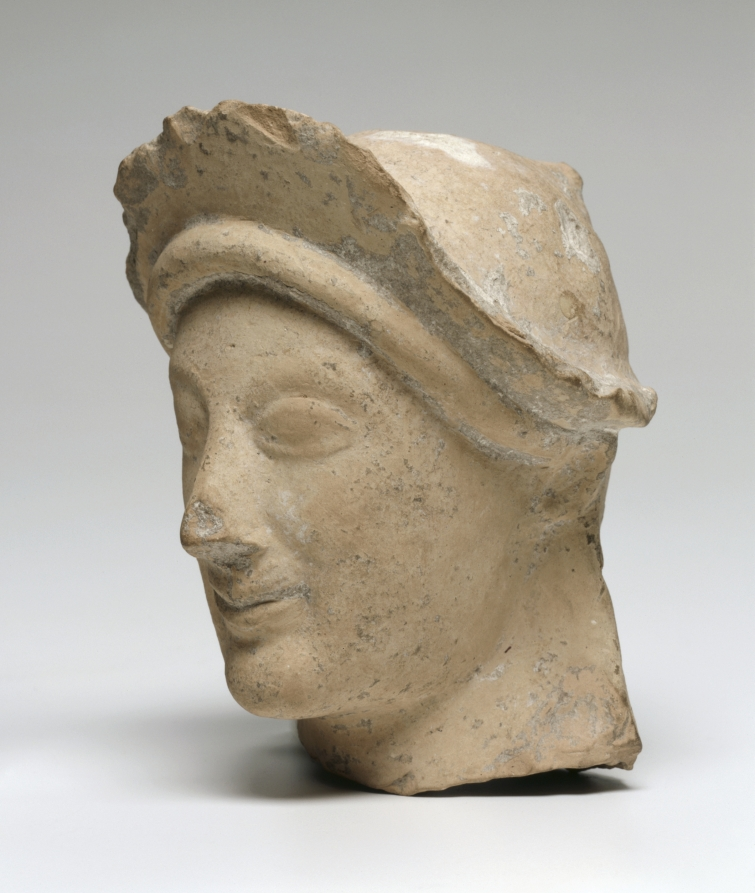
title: Woman's Head with Crown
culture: Greece, Sicily(?)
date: 500s BCE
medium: terracotta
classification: Sculpture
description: This terracotta sculpture depicts a woman with a wide headdress that is partly broken off. Her face is rendered in an Archaic style, with her mouth and eyes in low relief and her lips lifting upward in a serene smile. Originally, details such as the eyes and decoration on the headdress would probably have been painted on the surface of the sculpture.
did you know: In ancient Greek sculpture, a wide crown often denoted a matron deity like Hera or Demeter.